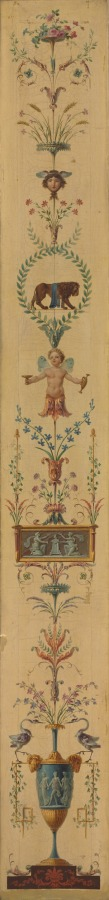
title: Decorative Panel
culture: France, 18th century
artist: Pierre Rousseau (French, 1751–1829)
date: 1790s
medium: oil on canvas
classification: Painting